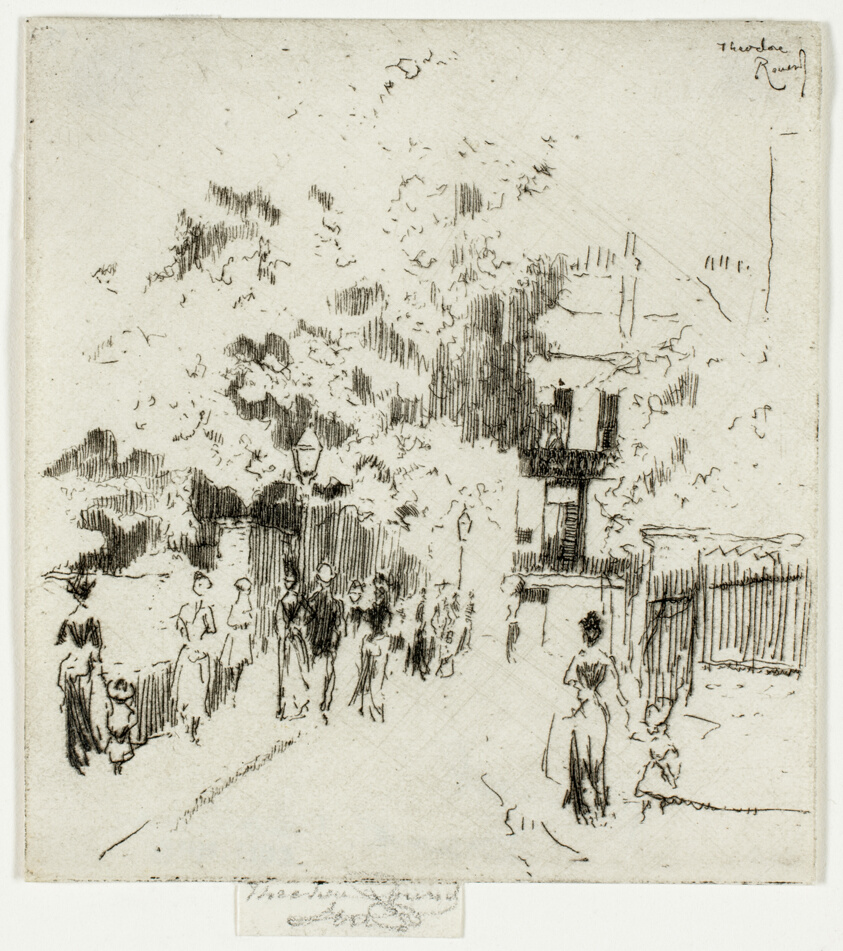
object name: Print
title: Bank Holiday, Corner of Beaufort Street, Chelsea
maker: Theodore Roussel (French, worked in England, 1847-1926)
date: 1888–89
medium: Etching in black on ivory wove paper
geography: England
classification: etching; paper; print; prints and drawing